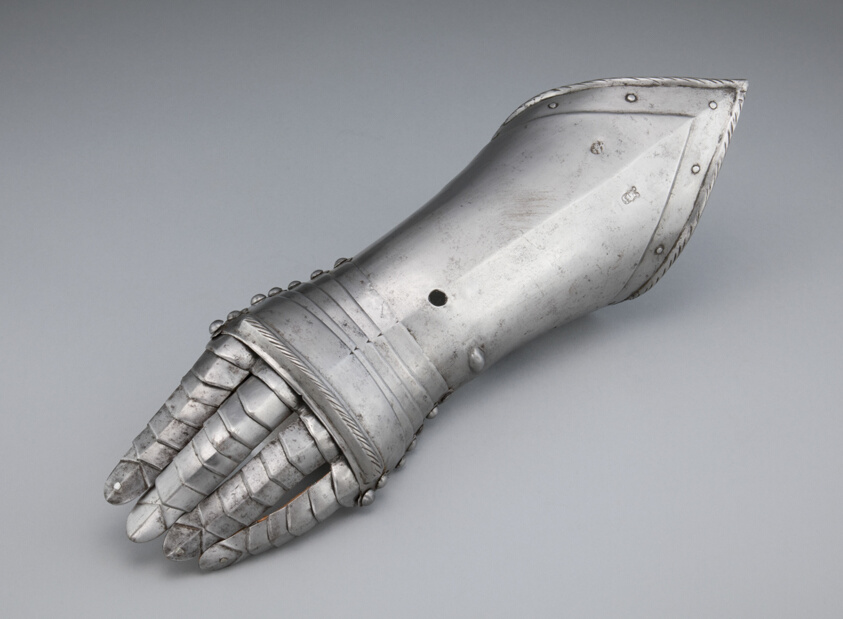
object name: Armor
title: Fingered Gauntlet for the Left Hand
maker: Southern German, Nuremberg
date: c. 1575/1600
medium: Steel and leather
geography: Nuremberg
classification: suit-gauntlet; armor; arms and armor